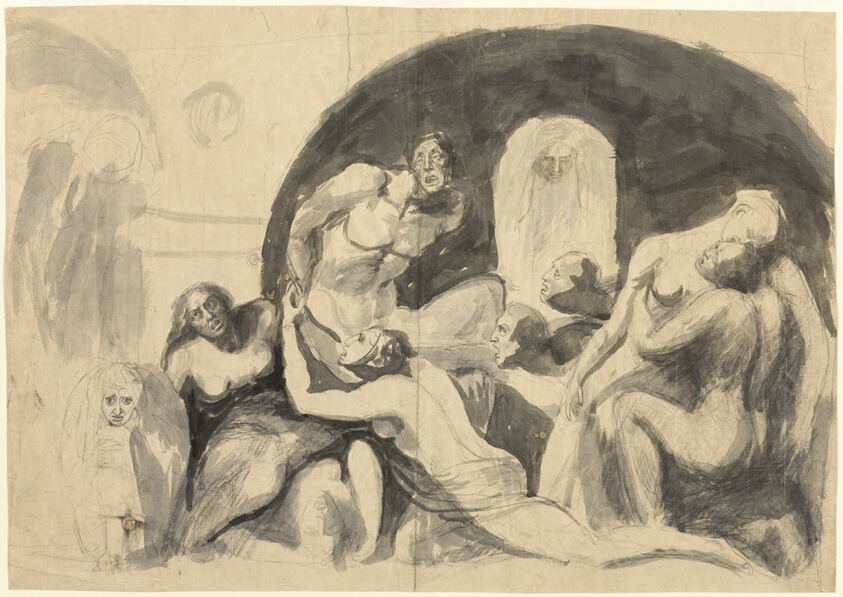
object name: Drawing and Watercolor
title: One Cycle of Hell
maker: Circle of Henry Fuseli (Swiss, active in England, 1741-1825); possibly William Blake (English, 1757-1827)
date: 1750/1850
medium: Graphite, with pen and black ink, and brush and black and gray wash, on cream laid paper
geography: England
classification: graphite; drawings (visual works); prints and drawing; paper